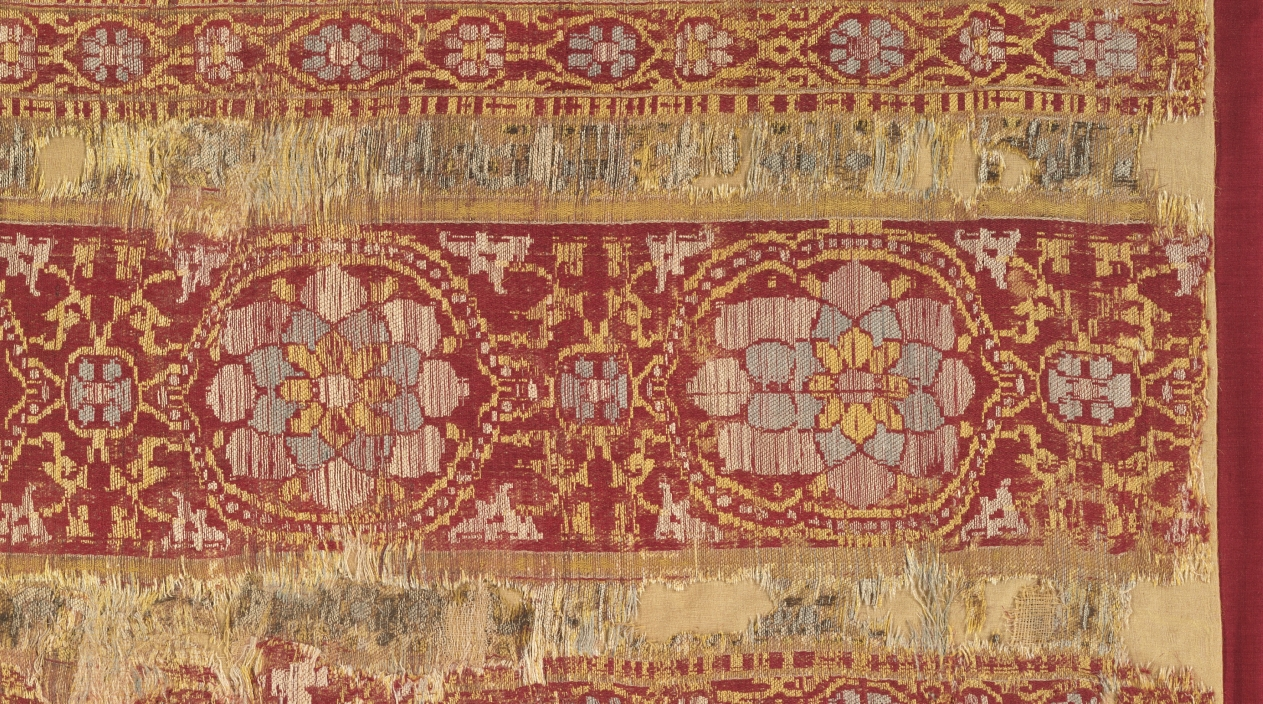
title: Tent Hanging (Part of a Larger Piece)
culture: India, Gujarat, Ahmadabad, 16th-early 17th century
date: 1560–1610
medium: Silk; lampas weave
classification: Textile